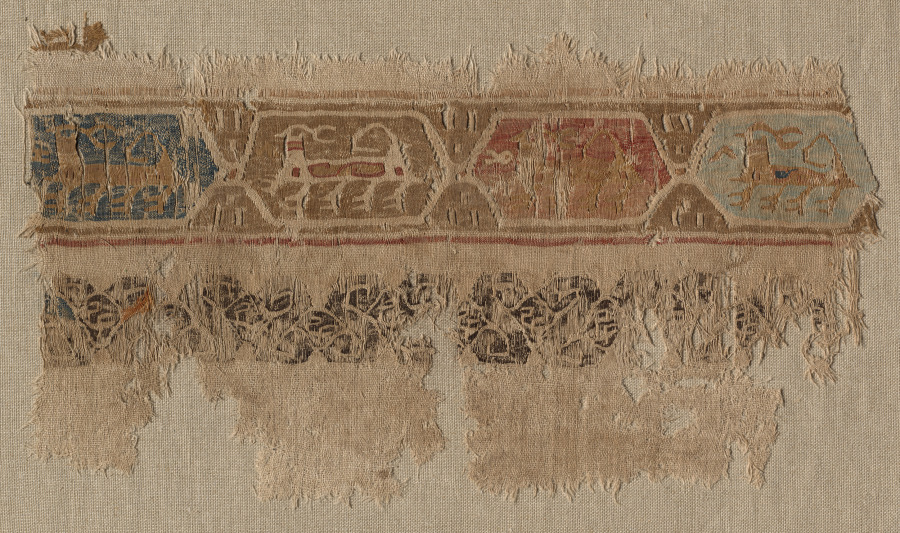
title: Fragment of a Tiraz-Style Textile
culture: Egypt, Fatimid period, Caliphate of al-Mustansir, 1000s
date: 1081–94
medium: tabby ground with inwoven tapestry ornament; linen and silk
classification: Textile